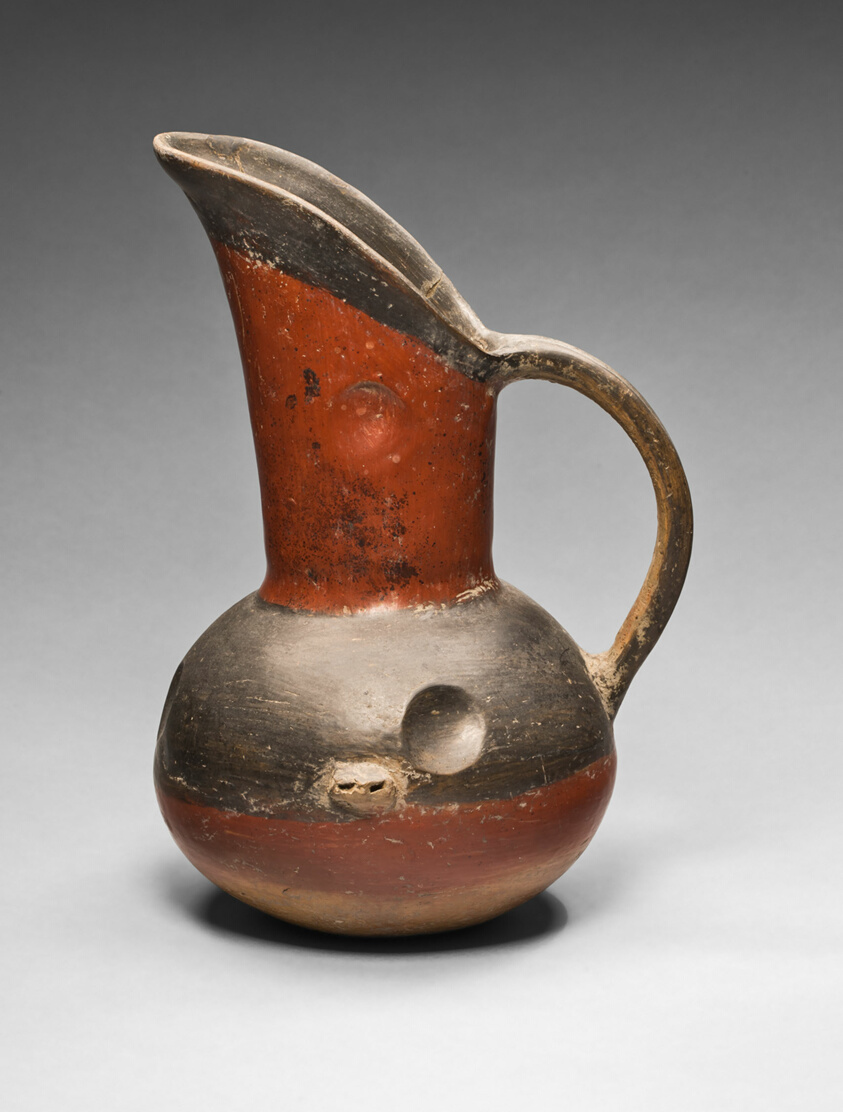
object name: Vessel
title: Polychrome Pitcher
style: cholula, mesoamerican, americas, Arts of the Americas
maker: Cholula (Cholula, Mexico)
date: 1400–1520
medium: Earthenware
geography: Cholula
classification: pitcher (vessel); earthenware; art of the americas; vessel; ceramics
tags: servingware